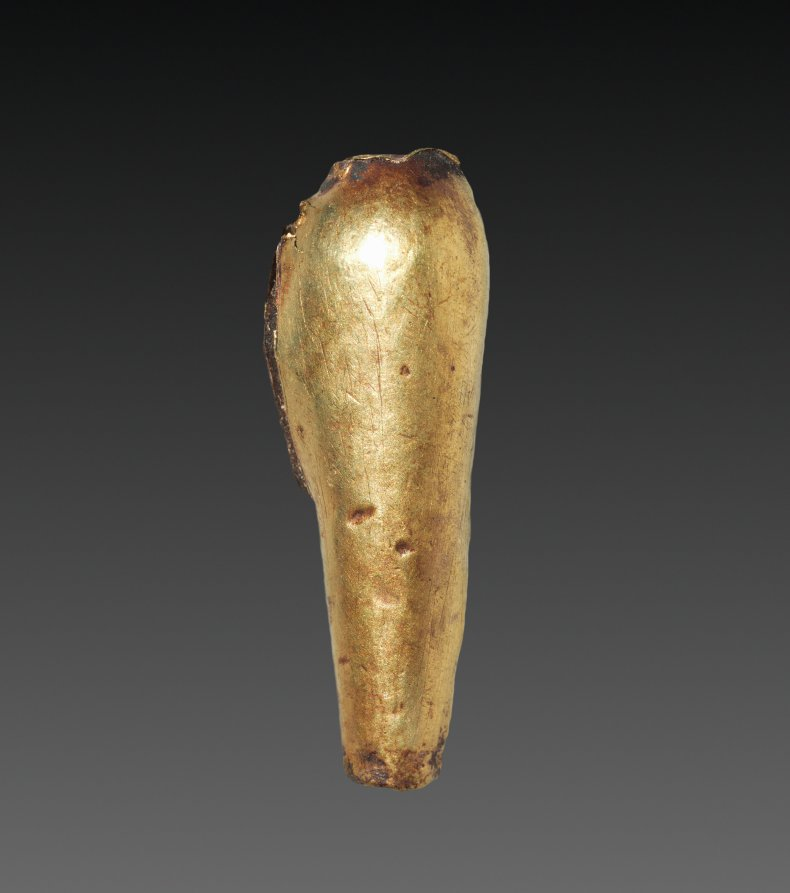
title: Teardrop-Shaped Bead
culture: Egypt, Middle Kingdom (2040–1648 BCE), Dynasty 12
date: 1980–1801 BCE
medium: gold over calcite gesso core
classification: Jewelry